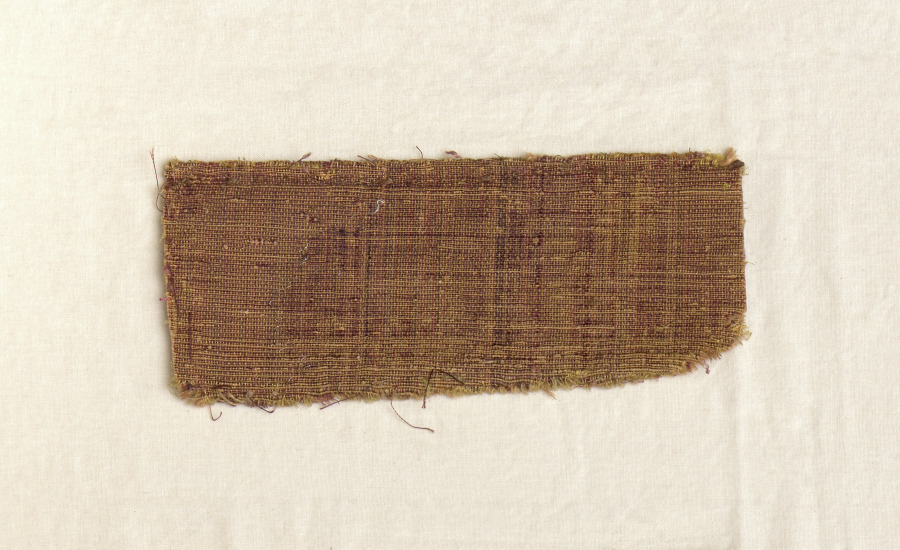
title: Fragments from Chasuble Front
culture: Italy, early 16th century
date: early 1500s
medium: velvet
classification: Velvet